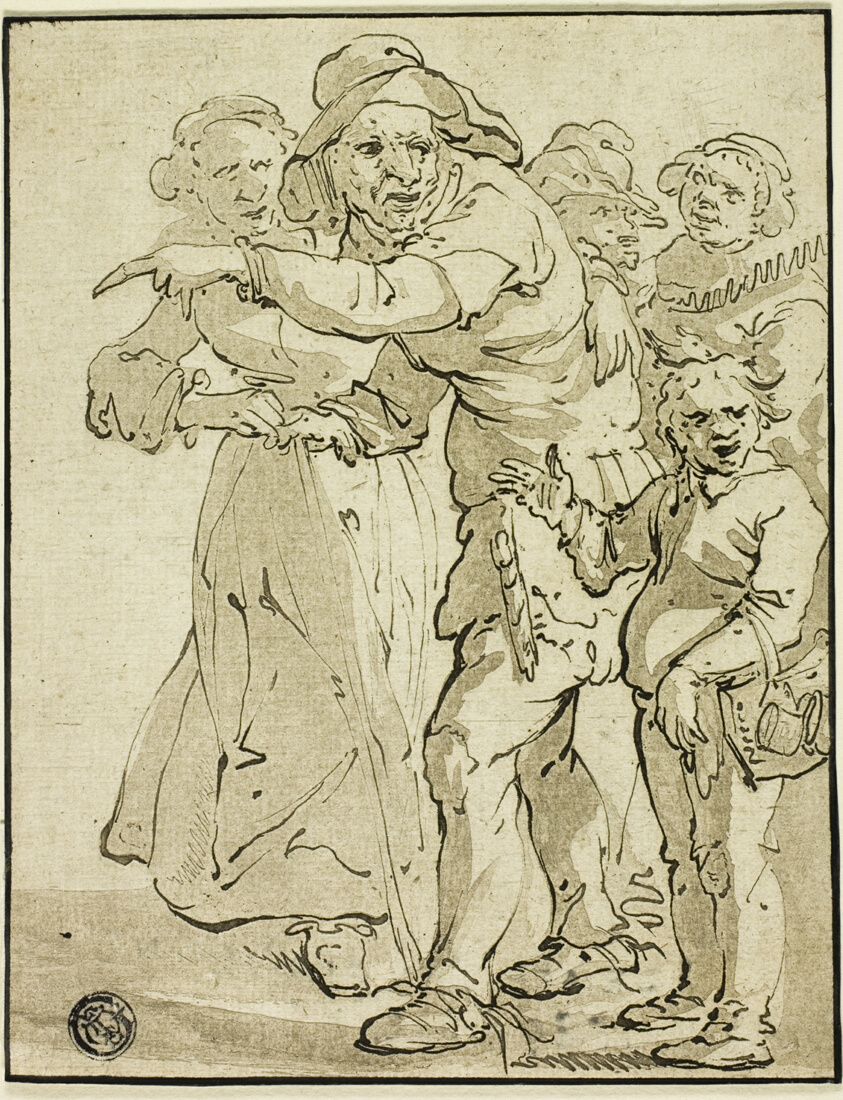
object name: Print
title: Old Man Pointing Left, plate 8 from Dessins des meilleurs Peintres d'Italie, d'Allemagne et des Pay-Bas Tirés de divers célebres Cabinets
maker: Maria Catharina Prestel (German, 1747-1794; after Adriaen Pietersz. van de Venne (Dutch, 1589-1662)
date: 1780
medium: Etching and aquatint on ivory laid paper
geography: Netherlands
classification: pen and ink drawings; drawings (visual works); prints and drawing